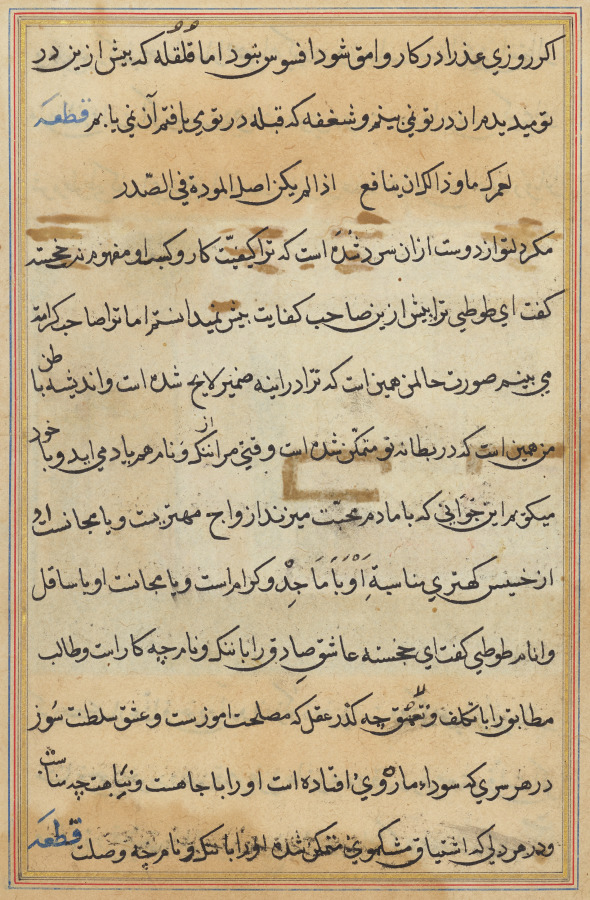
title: Page from Tales of a Parrot (Tuti-nama): text page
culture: Mughal India, court of Akbar (reigned 1556–1605)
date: c. 1560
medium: gum tempera, ink, and gold on paper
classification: Painting